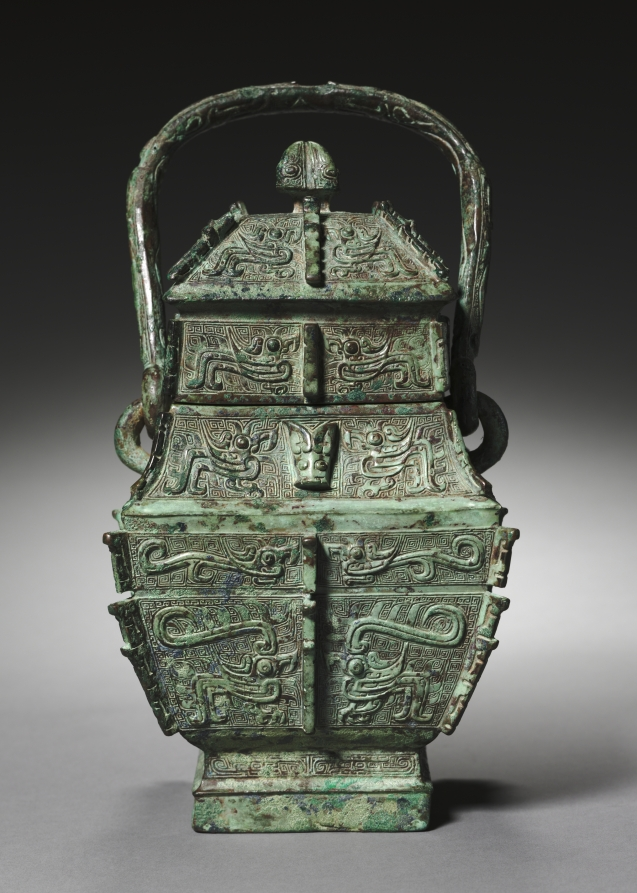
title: Square Wine Container (Fangyou)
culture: China, Henan province, probably Anyang, Shang dynasty (c. 1600–c. 1046 BCE), Anyang phase (c. 1250–1046 BCE)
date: c. 1250–1046 BCE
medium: bronze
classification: Metalwork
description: From the finely proportioned body to the elaborate decoration cast with great precision, this ritual wine vessel displays the artistic refinement and technical virtuosity that marked the full blossoming of late Shang bronze art. The dramatic contrast of the crested birds (kuifeng) against the dense background of spiral patterns (leiwen) gives the vessel a new force, clarity, and intense vitality. The distinctive square body also places it as a rare and important type among the more usual round or ovoid types.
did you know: The bird motif decoration of this bronze is uncommon; more often these bronzes are decorated with a combination of birds and dragons.